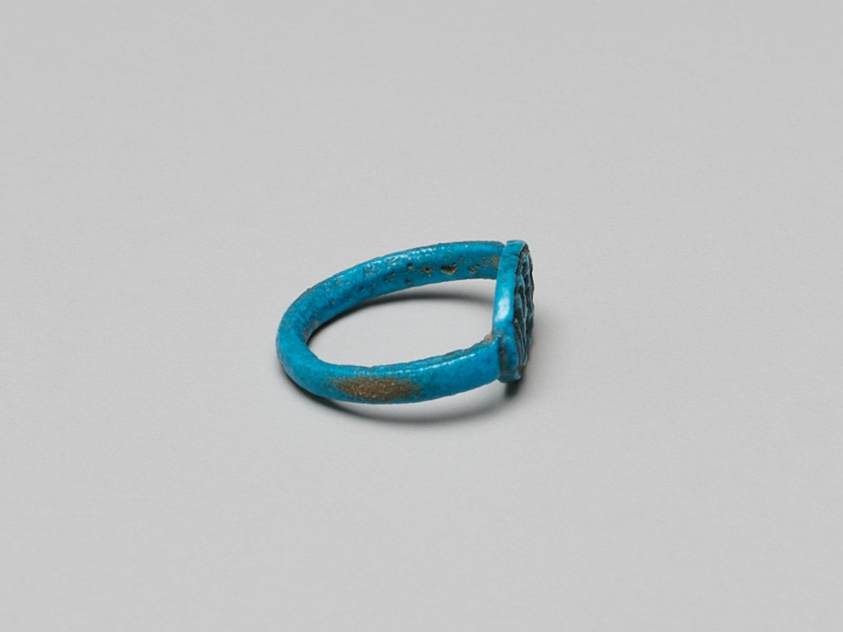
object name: Costume and Accessories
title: Finger Ring with the Throne Name of King Horemheb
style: new kingdom, eighteenth dynasty, ancient, egyptian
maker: Egyptian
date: New Kingdom, Dynasty 18, reign of Horemheb (about 1323–1295 BCE)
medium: Faience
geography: Egypt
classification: ring (jewelry); jewelry; ancient art; costume; faïence (composite material)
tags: Hieroglyphs, jewelry, king